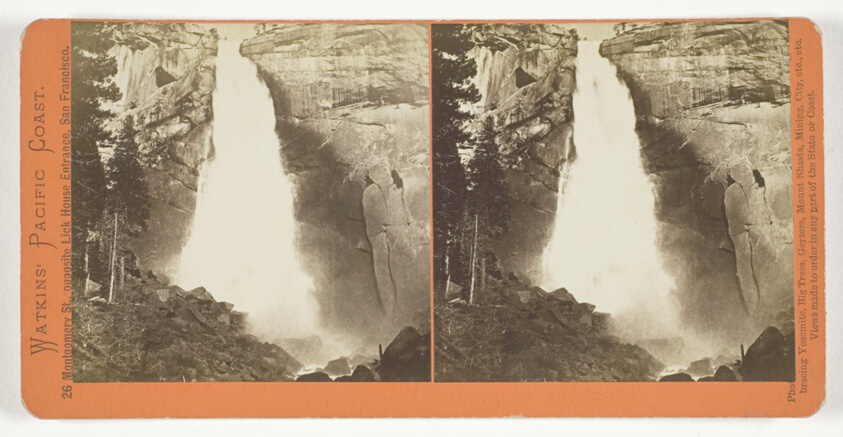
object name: Photograph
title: The Nevada Fall, 700 ft., Yosemite, from the series "Watkins' Pacific Coast"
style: 19th century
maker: Carleton E. Watkins; American, 1829-1916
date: 1861/76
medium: Albumen print, stereo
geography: United States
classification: stereograph (albumen); albumen silver print; photographic process; photography; photograph